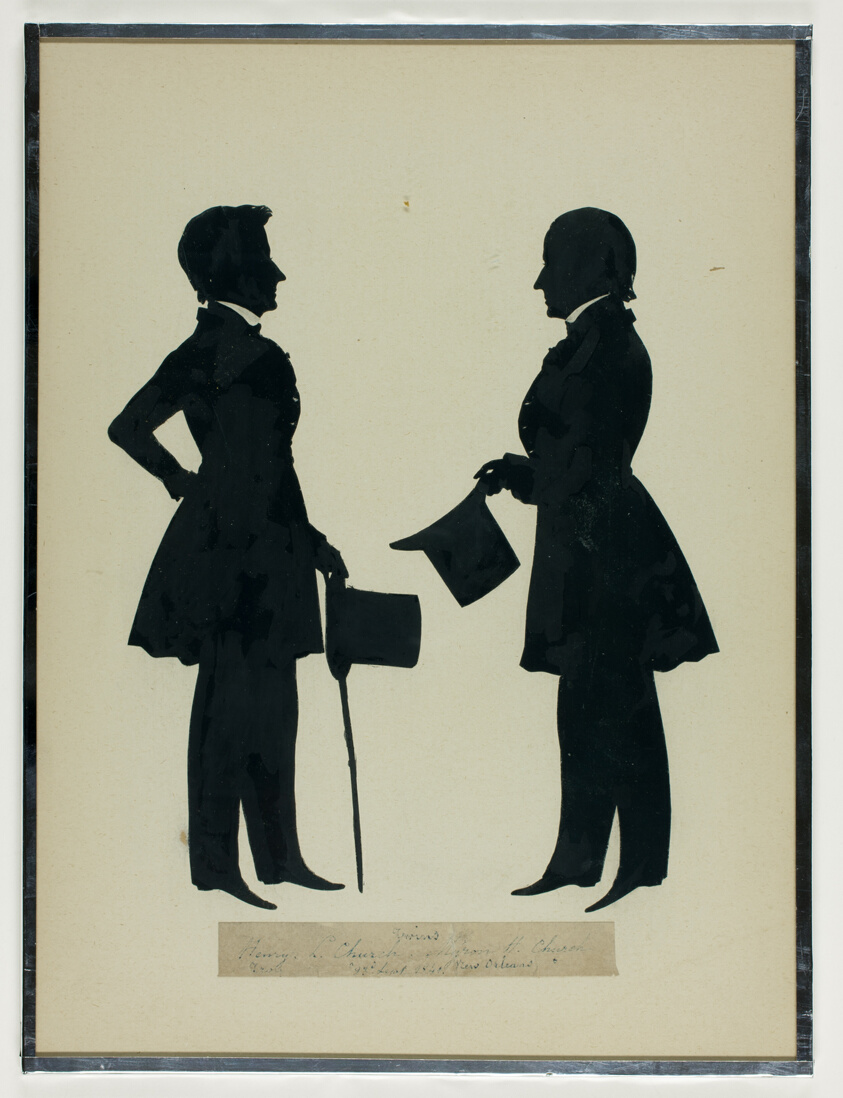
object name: Drawing and Watercolor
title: Henry L. and Myron H. Church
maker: Auguste Edouart (French, 1789-1861)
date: September 23, 1841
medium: Cut paper silhouette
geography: France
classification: silhouette; prints and drawing; paper